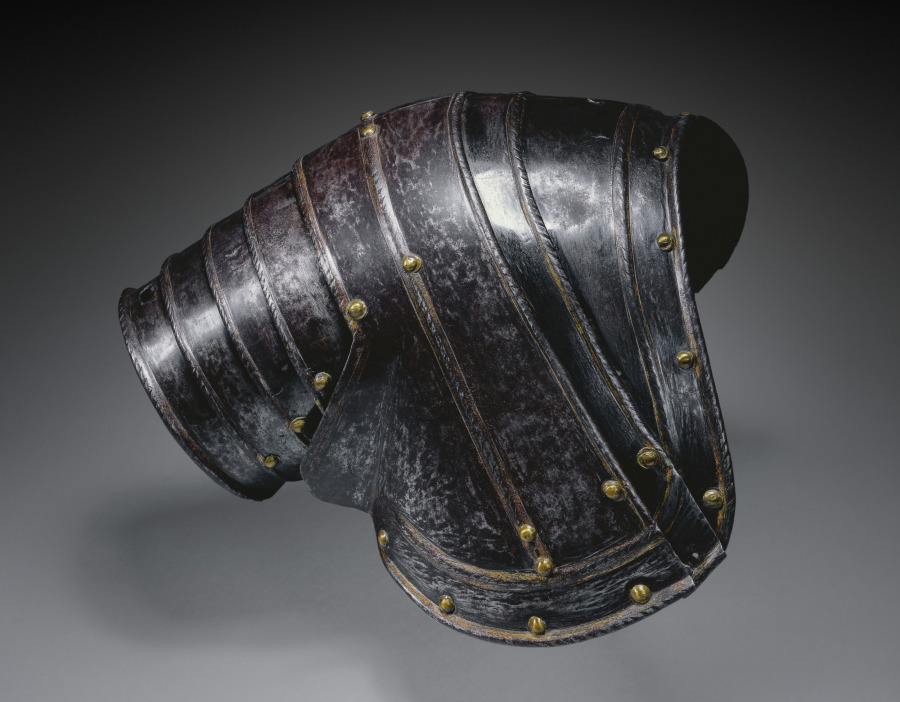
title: Pauldron for Right shoulder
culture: Italy, 16th century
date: c. 1560–70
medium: steel, blued and gilded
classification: Arms and Armor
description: This element for the shoulder once belonged to a suit decorated by the bluing technique, a process of superheating armor plates to achieve a deep blue color. Bluing required heating to at least 590 degrees Fahrenheit, the temperature at which oxidation occurs. Although the original color is now darkened it would have originally been a deep shade of blue. It was further enhanced with gilding to create additional contrast for a refined appearance.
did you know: A pauldron is a component of plate armor that covers the shoulder and often the armpit, and parts of the back and chest as well.